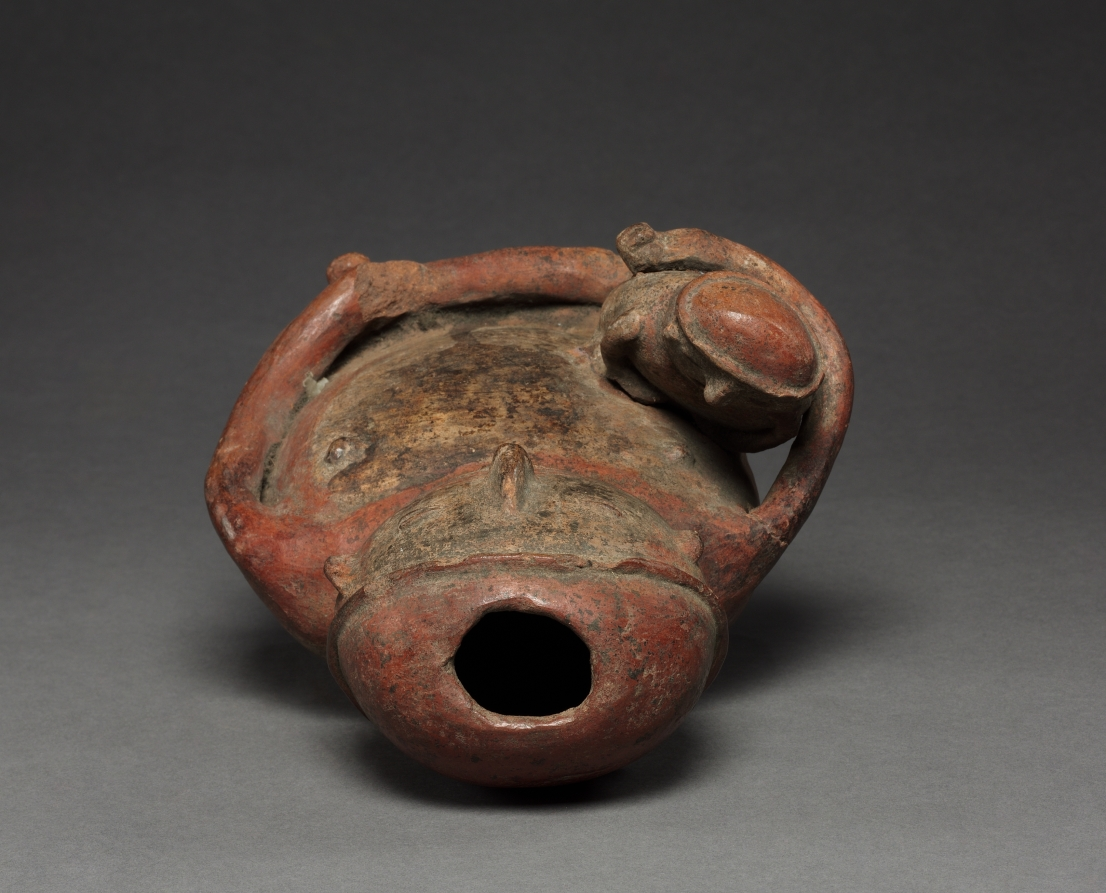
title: Figures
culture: Colombia, 18th-19th century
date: before 1921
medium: red ware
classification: Ceramic